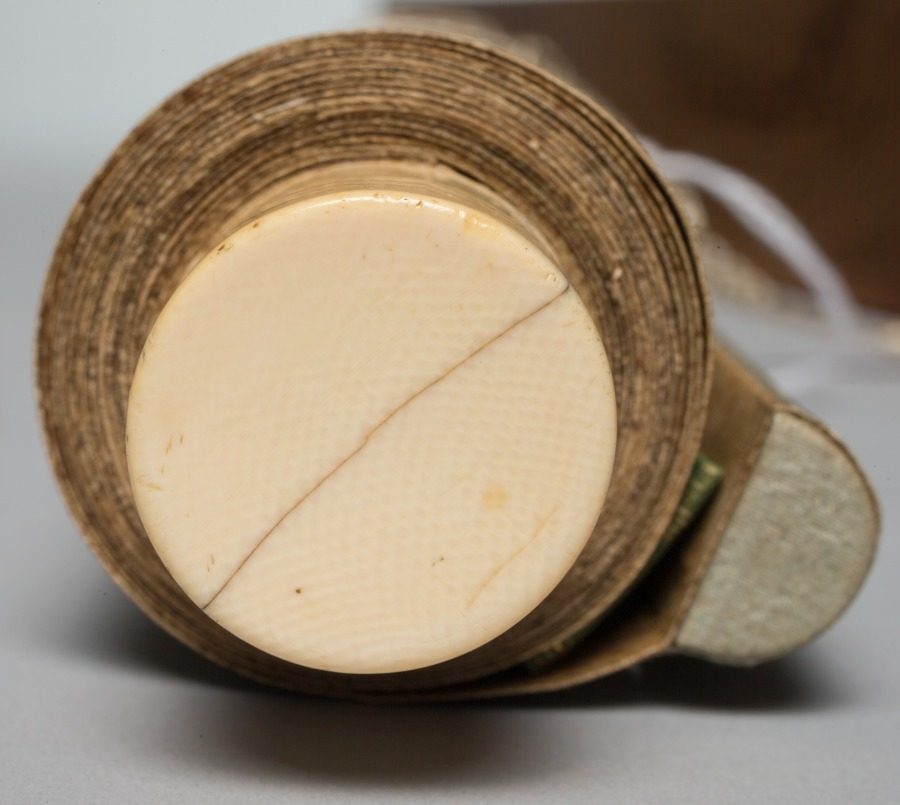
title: Lady with a Parasol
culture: Japan, Edo period (1615–1868)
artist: Koikawa Harumasa (Japanese)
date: early 1800s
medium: hanging scroll; ink, color, gold, and silver pigments on paper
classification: Painting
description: This painting depicts a young woman braving the elements as she hurries home from the local bathhouse. The action depicted accentuates her slender neck and bare legs. In later Japanese art, images of beautiful women in bare feet and a towel between their teeth have sensual overtones.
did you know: Spatters of white paint represent falling snow.